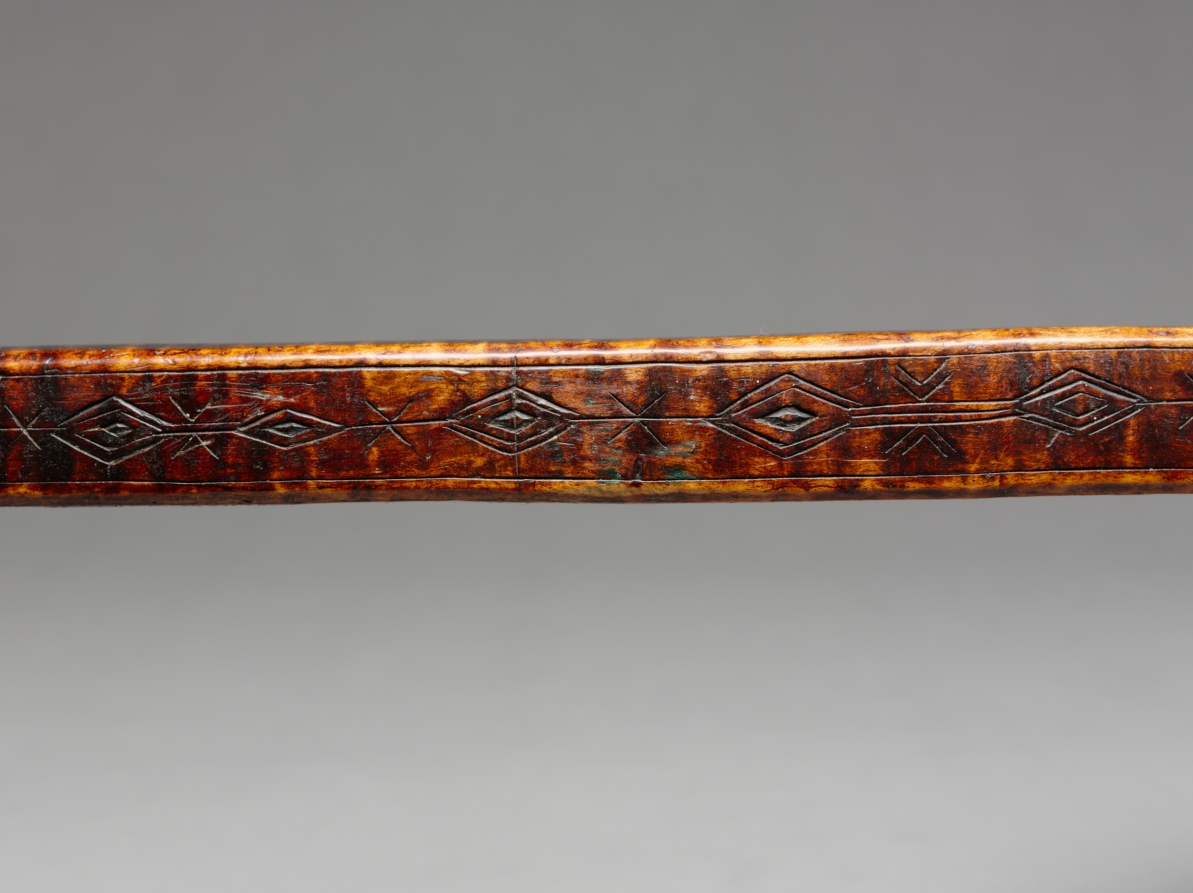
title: Ball-Headed War Club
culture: Native North America, Northeastern Woodlands, Great Lakes, Anishinaabe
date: late 1700s–early 1800s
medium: wood (maple?)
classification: Implements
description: The ball at the striking end of this club is clenched in an abstract, jawlike form that likely refers to a protector animal who endowed the owner with power. Incised on the shaft is a rich record of doodemag (singular, doodem, “totem”)—animals representing other-than-human progenitors from which Anishinaabe peoples trace their descent. (The Anishinaabeg, a group of related Great Lakes nations, include the Odawa, Ojibwe, Potawatomi, and others.) Included is an antlered creature, perhaps a caribou, along with mammals, birds, and powerful spirit beings: the thunderbird, its wings outstretched, and perhaps the long-tailed underwater panther. When this example was made, clubs had become symbols of status and earlier ways of life, having been replaced as favored weapons by metal tomahawks and European firearms. Today, clubs are part of powwow regalia.